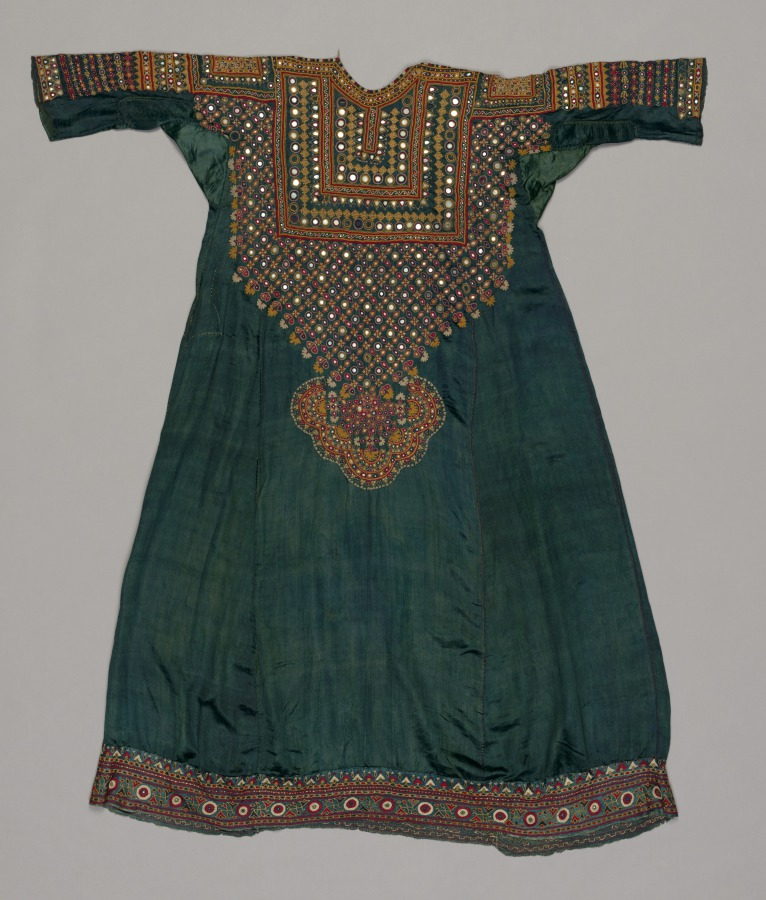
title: Woman's Dress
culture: Western India, Gujarat, Kachchh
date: 1800s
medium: silk thread on silk ground, embroidery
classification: Garment